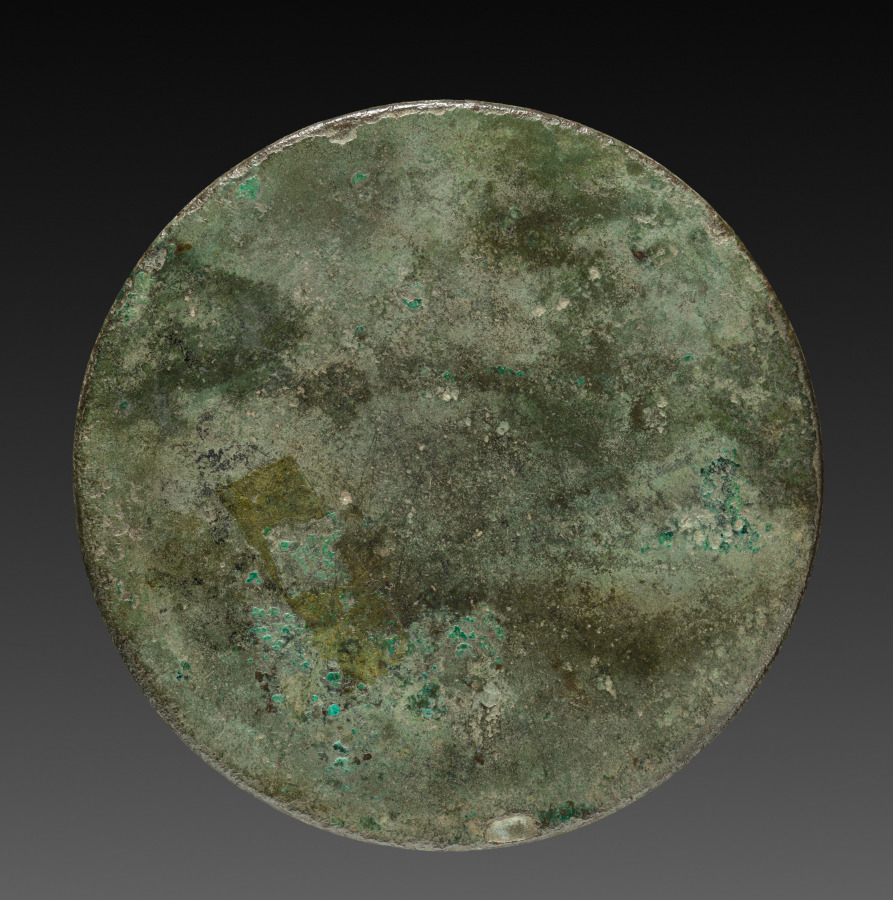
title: Mirror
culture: Japan, Muromachi period (1392–1573)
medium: bronze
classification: Metalwork